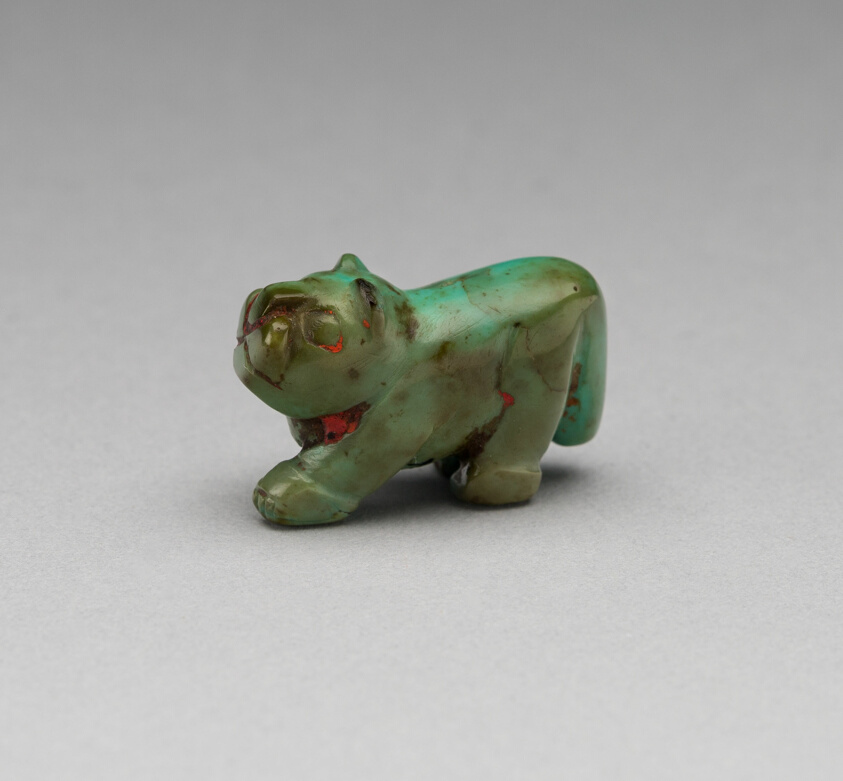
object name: Sculpture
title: Feline Figure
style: chimú, late intermediate period, Pre-Columbian, americas, Arts of the Americas, andean, andes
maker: Chimú (North coast, Peru)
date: 1100–1470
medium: Turquoise with cinnabar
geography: Peruvian North Coast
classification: stone; sculpture; art of the americas